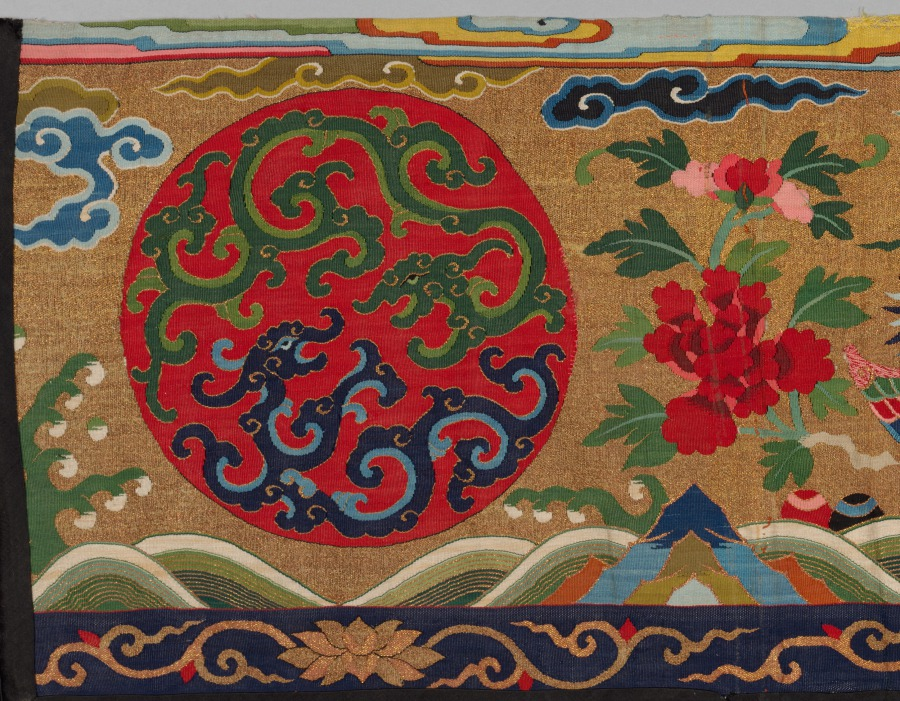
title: Strip of Silk Tapestry (Kesi)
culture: China, Qing dynasty (1644–1911)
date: 1700s–1800s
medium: Silk and gold thread; tapestry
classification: Tapestry